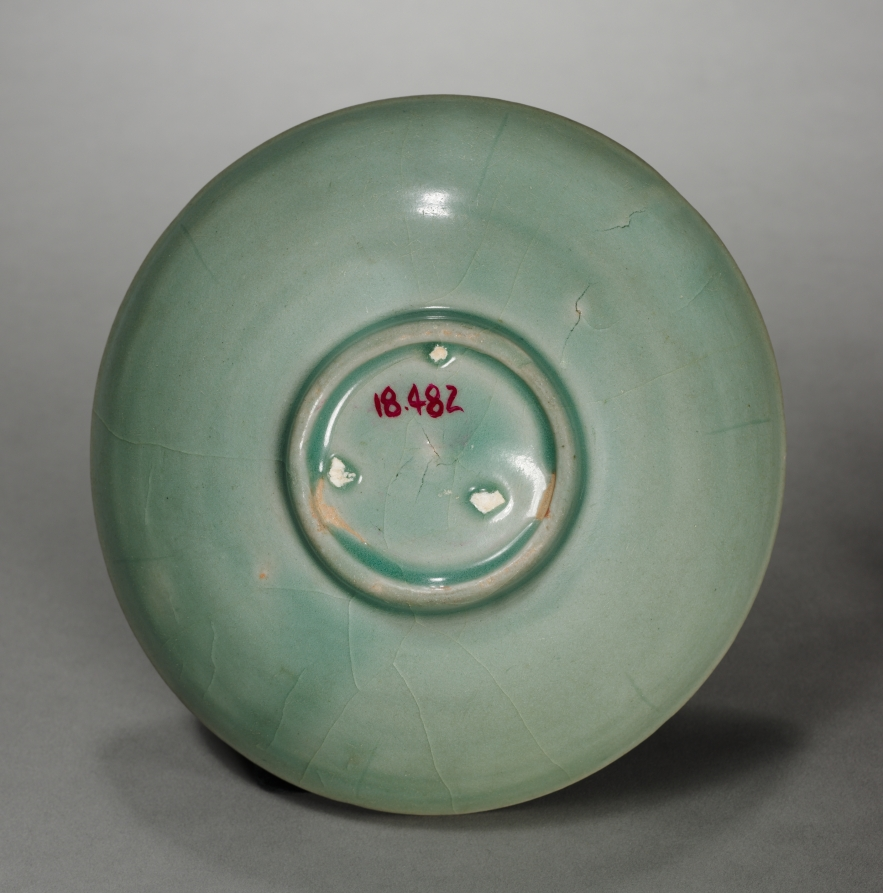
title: Bowl with Incised Parrot Design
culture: Korea, Goryeo dynasty (918–1392)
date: 1100s–1200s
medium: celadon ware with incised decoration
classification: Ceramic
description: A wide bowl like this example was especially suitable for drinking powdered tea shaved from a compressed tea cake, the most commonly enjoyed type during the Goryeo period. The image of flying parrots incised on the inner wall of this tea bowl must have made the moment of drinking tea more enjoyable and even magical.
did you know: As early as the seventh century, the practice of drinking tea and wine became an important part of elite leisure culture in Korea.